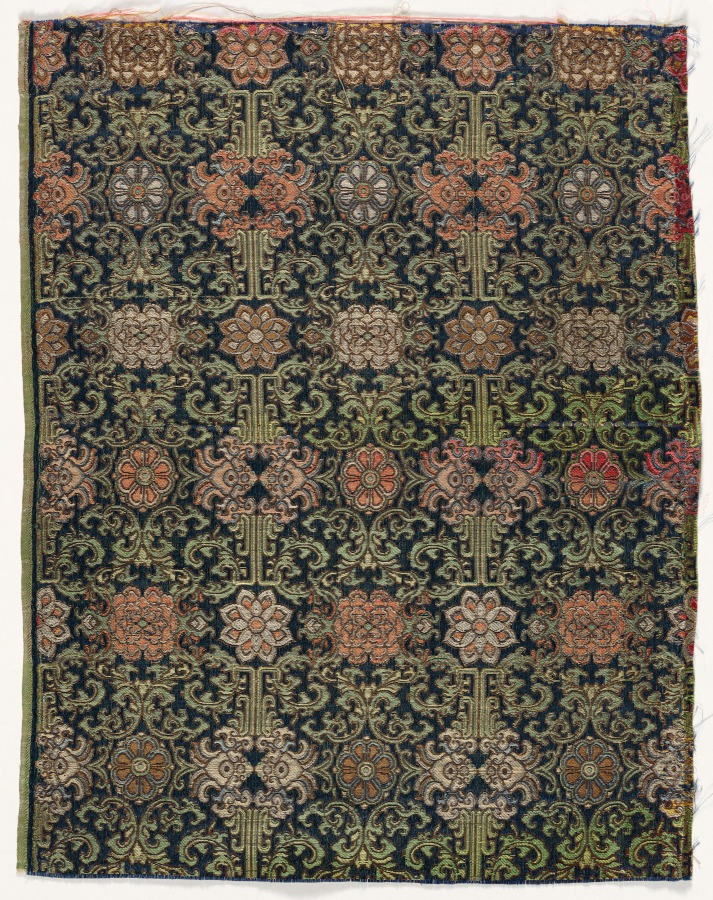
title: Fragment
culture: Japan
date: 1800s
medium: silk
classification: Textile